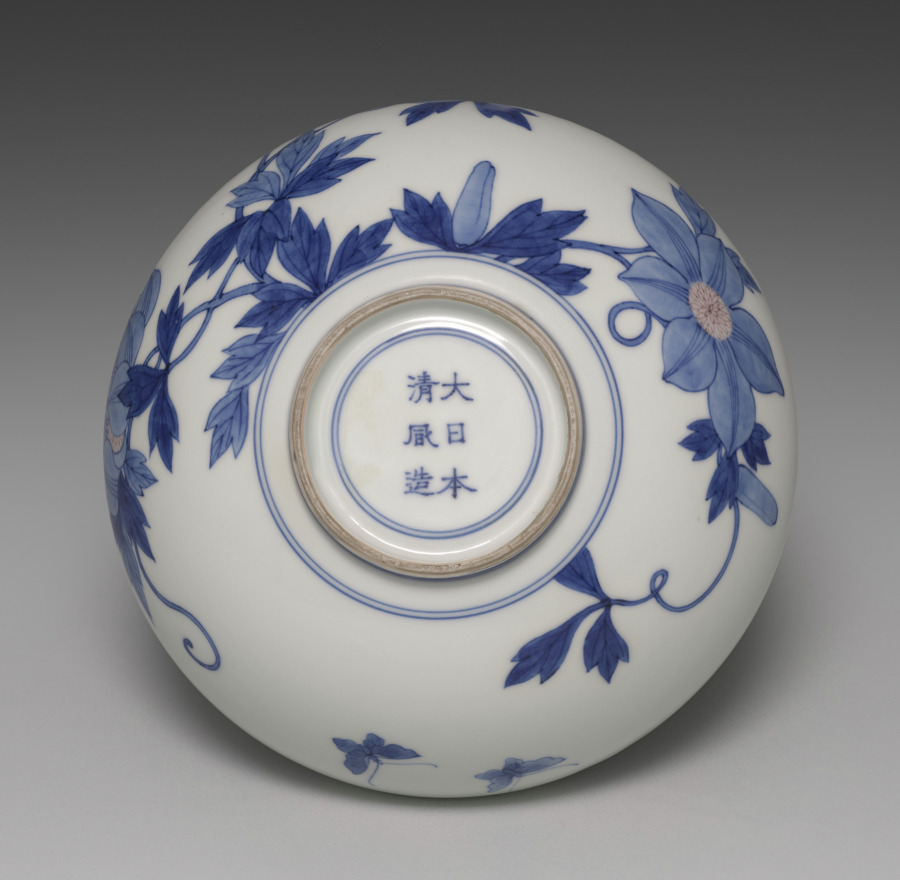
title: Dining Bowl with Clematis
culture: Japan, Meiji period (1868–1912)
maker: Seifū Yohei III (Japanese, 1851–1914)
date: 1893–97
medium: Porcelain with underglaze and overglaze colors, molded and incised designs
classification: Ceramic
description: The bowl is an especially well-executed example of Yohei III’s work in underglaze blue combined with other underglaze colors. This low-profile dining bowl has paintings of flowering clematis vines under the glaze in blue and red. Water is depicted with blue in the bottom of the bowl. The lines of white used to show motion on the water’s surface were created using either a reserve technique, where blue was omitted, or a masking technique, where parts of the surface were covered before applying the blue. A pair of butterflies flutters across one side. The foot is decorated with a pattern of spirals in blue, and the lip curves in slightly. The overall effect is one of seeing the flowering vine hanging down, hovering just above the surface of a pond, whose slight disturbances hint at unseen fish swimming below.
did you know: This bowl shows an environment painted in the round.